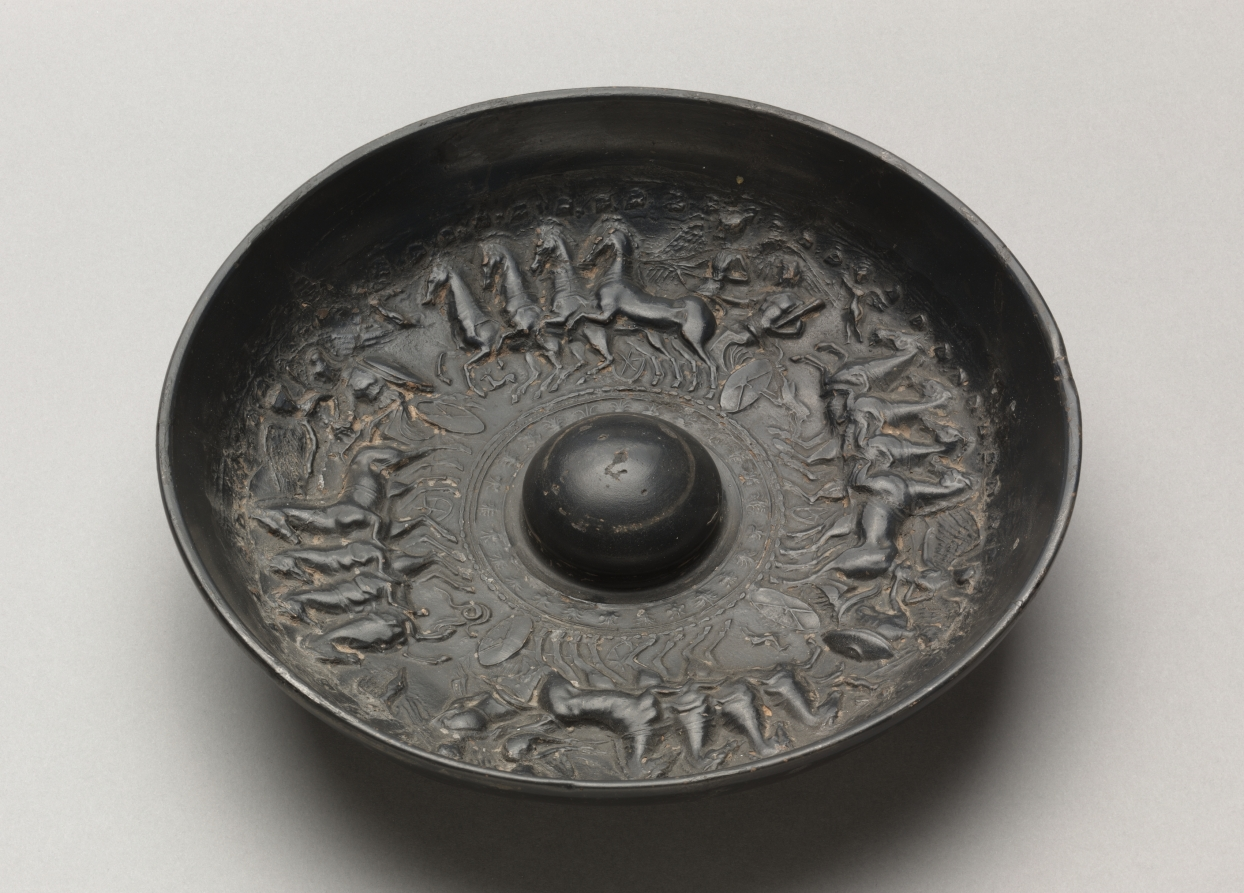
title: Black-Gloss Mesomphalic Phiale (Libation Bowl): Apotheosis of Herakles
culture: South Italian, Campanian (Calenian)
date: 200s BCE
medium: ceramic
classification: Ceramic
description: Four four-horse chariots proceed around the interior of this libation bowl, each driven by a winged Nike (Victory) and accompanied by a flying Eros. Each carries a different figure—Athena, Herakles, Ares, and Dionysos—and small animals race along before the horses. The appearance of Herakles with these Olympians suggests his apotheosis.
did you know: This type of glossy ceramic vessel likely imitates costlier objects made of precious metal.